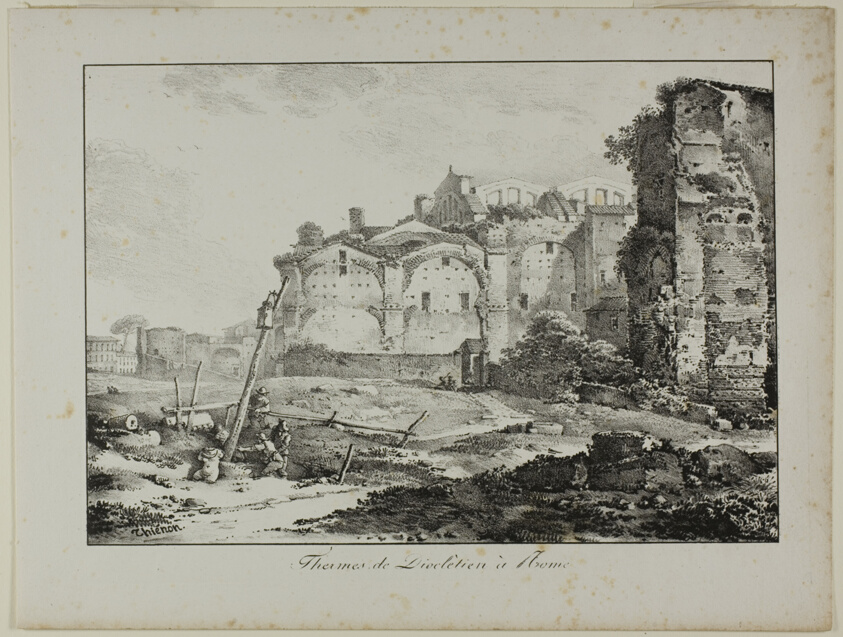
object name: Print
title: Baths of Diocletian, Rome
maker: Claude Thienon (French, 1772-1846); probably printed by Comte de Charles Philibert Lasteyrie du Saillant (French, 1759-1849)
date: 1817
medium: Lithograph in black on ivory wove paper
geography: France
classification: lithograph; print; prints and drawing